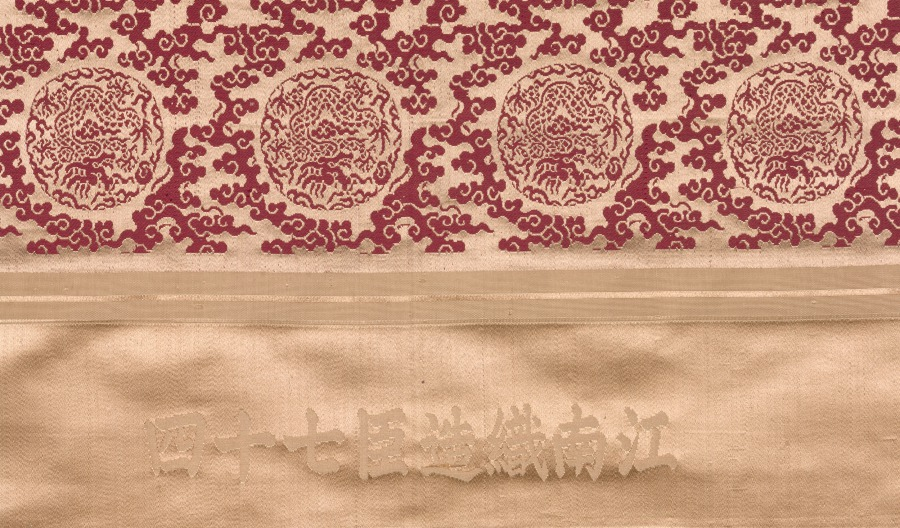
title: Loom Piece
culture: China, Qing dynasty (1644-1911)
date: 1700s-1800s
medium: silk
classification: Textile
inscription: (translated): "From the imperial [factory] at Chiang-Nan district by the agency Chih Tzau."